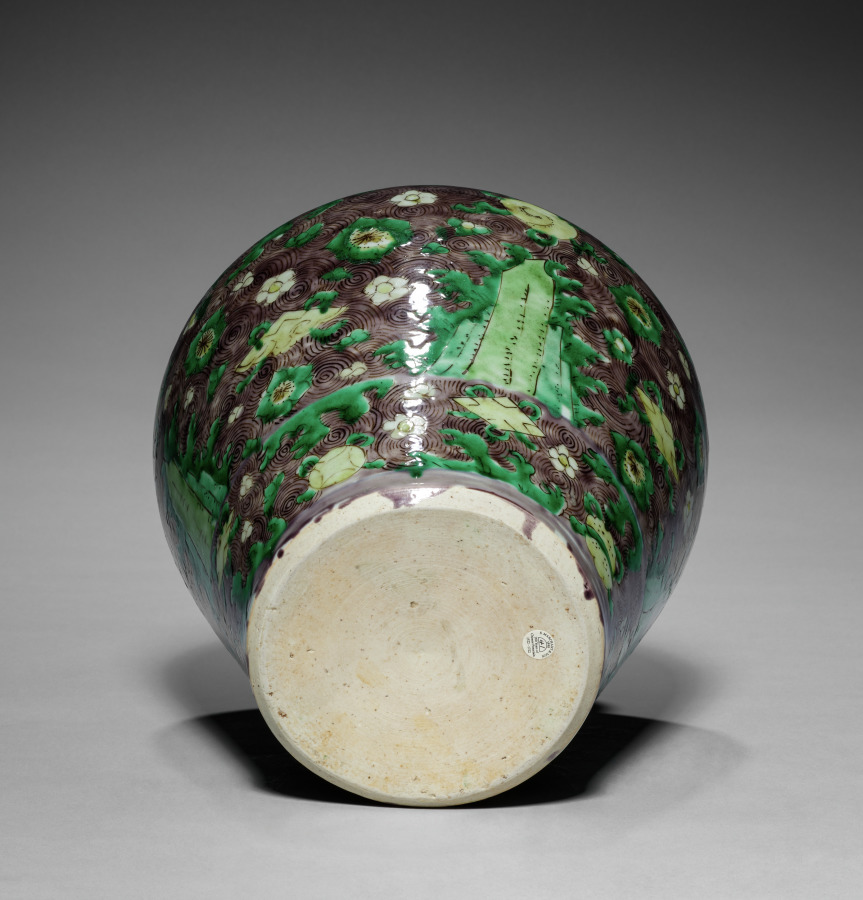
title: Baluster Jar and Cover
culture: China, Jiangxi province, Jingdezhen kilns, Ming dynasty (1368–1644) or Qing dynasty (1644–1911)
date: 1600–1650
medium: Porcelain with wucai (five-color) enamels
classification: Ceramic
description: The central motif on this jar is a mountain emerging from the sea, symbolizing Mount Sumeru in Buddhist cosmology, and representing the central axis in the universe in Daoism. White cherry blossoms floating on the wavy ground are surrounded by auspicious symbols such as the coin for wealth and the lozenge for victory. The yellow knob on the jar’s cover depicts a cherry blossom. Other fortuitous motifs—such as the leaf of protection, the pearl to grant wishes, the stone chime for celebration, rocks symbolizing longevity—also decorate the lid. While most jars have lost their covers over time, this jar retains its original lid.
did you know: The waves are depicted in a rich aubergine, or purple, glaze.